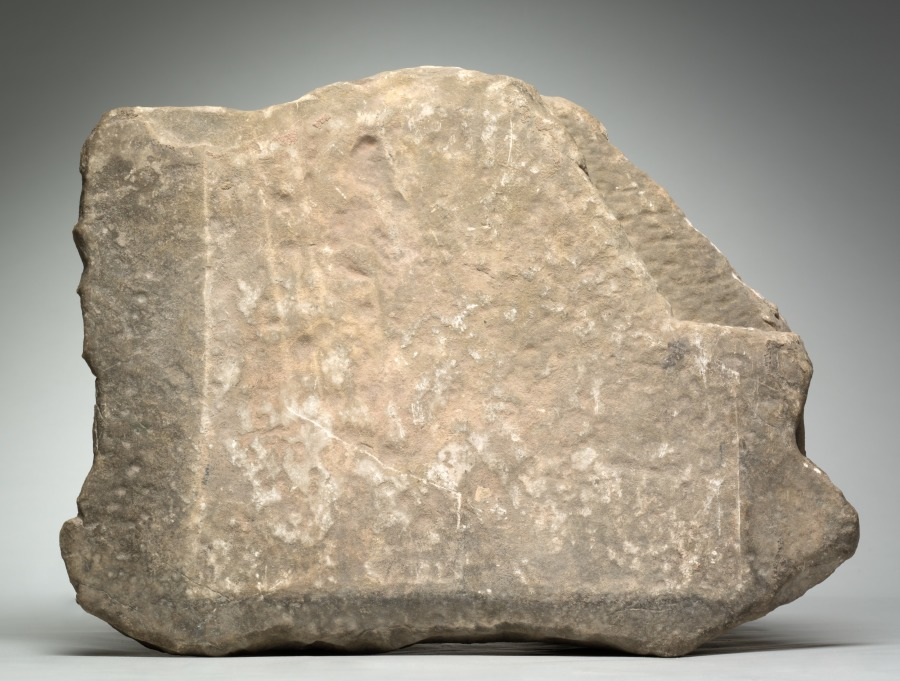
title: Engaged Capital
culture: Southern France, Abbey of Larreule, near Tarbes, 15th century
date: 1400s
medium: limestone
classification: Sculpture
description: This capital belongs to a surviving group including other architectural fragments that once decorated the cloister of the Abbey of Larreule. A cloister was a covered walkway or arcade, usually around all four sides of a square area of grass (the "cloister garth"). The seclusion of the cloister was the monks’ exclusive domain, off limits to others. Here, the monks were supposed to pray, study, meditate, and exercise in privacy and solitude. Such cloister capitals served both to instruct the monks and as a focus for their devotions. Other capitals in this series are installed in the Jardin Massey at Tarbes, near the original abbey. An arch from Larreule has been assembled with other associated French capitals at The Cloisters in New York.